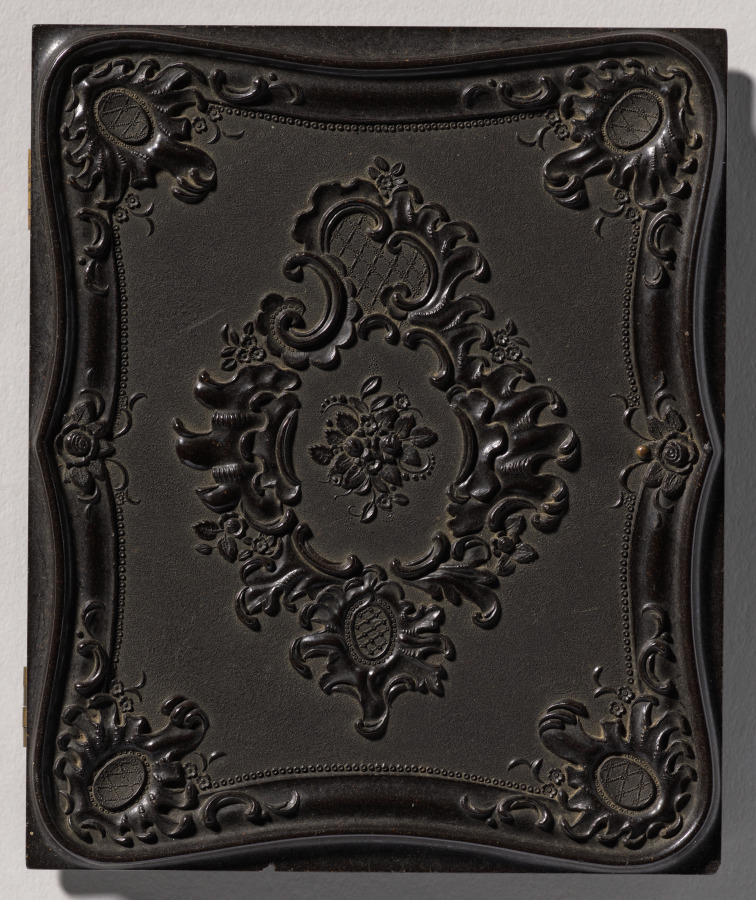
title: Child with Drum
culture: America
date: 1850s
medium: daguerreotype, quarter-plate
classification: Photograph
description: For this finely toned daguerreotype, an unknown photographer skillfully manipulated a bulky camera into a low vantagepoint, ensured even lighting, and positioned the quaintly dressed subject against a neutral background to create a charming portrait. The child was carefully coached to stare directly into the lens and to hold the toy drum and drumsticks convincingly. Perhaps the drum is meant to recall earlier times in American history and to symbolize its fight for independence.